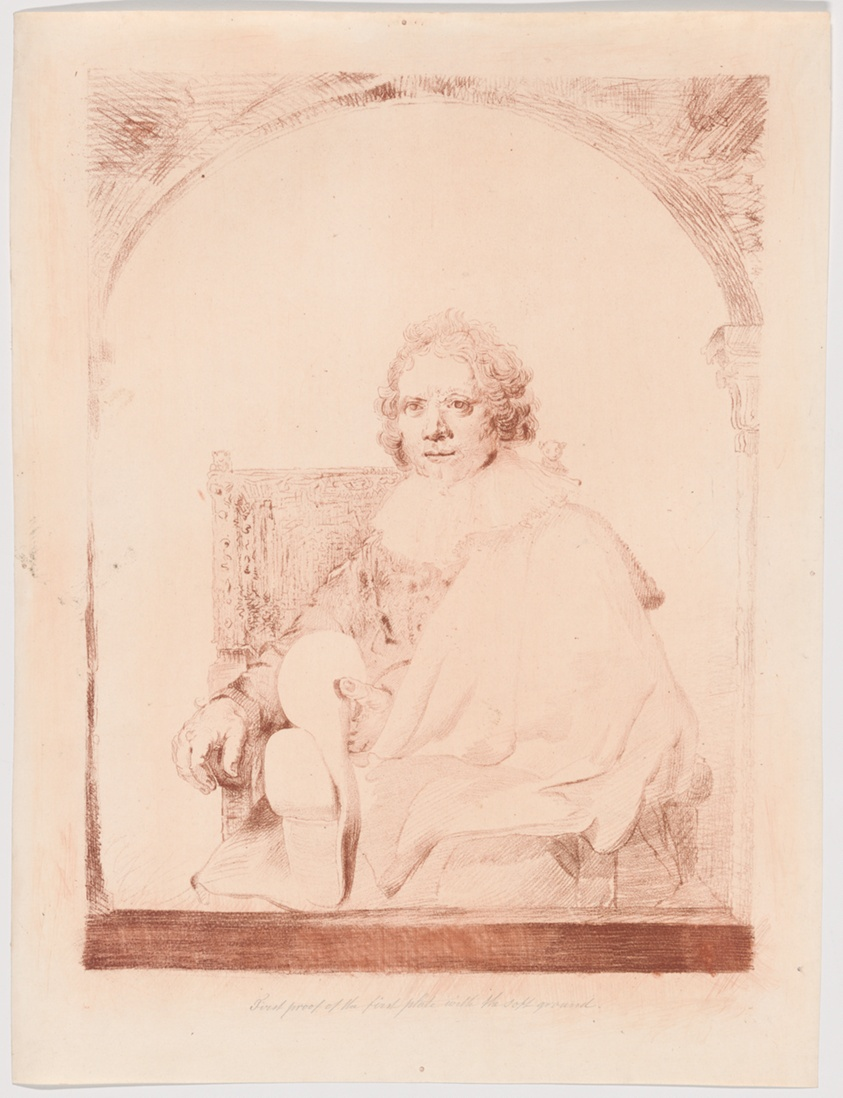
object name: Print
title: Portrait of a Man in an Armchair, from Collection d'imitations de Dessins d'après les Principaux Maîtres Hollandais et Flamands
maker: Christian Josi (Dutch, died 1828); after Rembrandt van Rijn (Dutch, 1606-1669)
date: 1826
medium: Soft ground etching, with roulette, printed in red on white wove paper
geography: Holland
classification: etching; print; prints and drawing